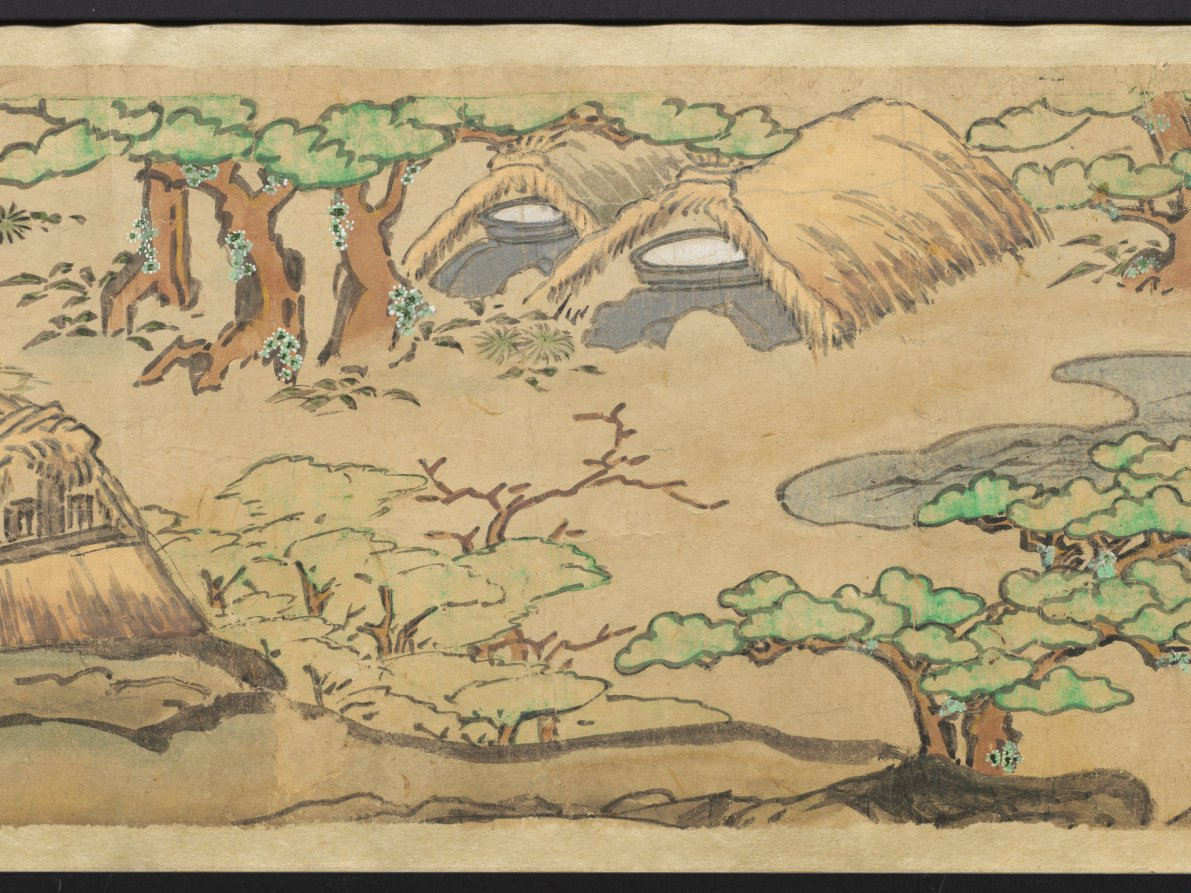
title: The Saltmaker's Story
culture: Japan, Edo period (1615–1868)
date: early 1600s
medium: One of a pair of handscrolls; ink, color, and gold on paper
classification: Painting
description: Once read and copied by girls at New Year’s celebrations and included in dowries, The Saltmaker’s Story is a rags-to-riches tale in which daughters are gifts from the gods. Despite his simple outlook, the main character progresses from humble roots as an associate at Kashima Shrine to the elite status of grandfather of the emperor through the intervention of the Kashima deity. The Saltmaker’s Story is traditionally presented in a set of three scrolls, but the text of this set has been removed by a previous owner, who remounted the illustrations as a pair. The paintings of this one take us from right to left through the first half of the tale.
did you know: This handscroll originally had texts before its paintings, but the texts were removed.